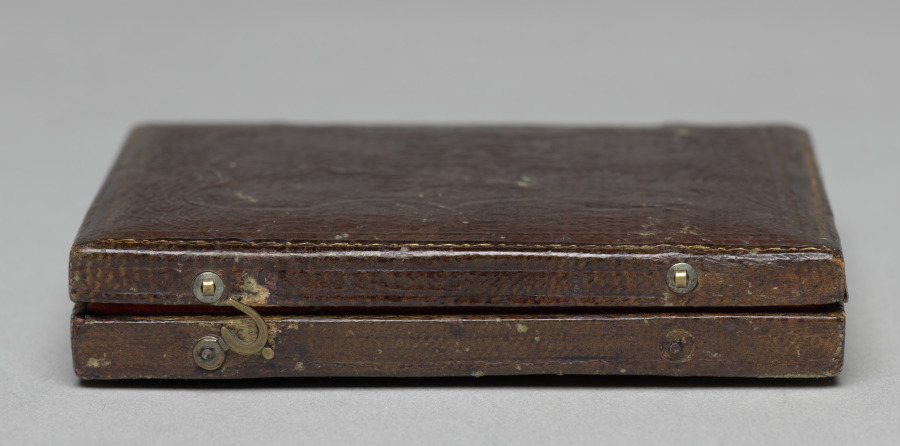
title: Magician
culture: America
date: c. 1850–55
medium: daguerreotype, sixth plate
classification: Photograph